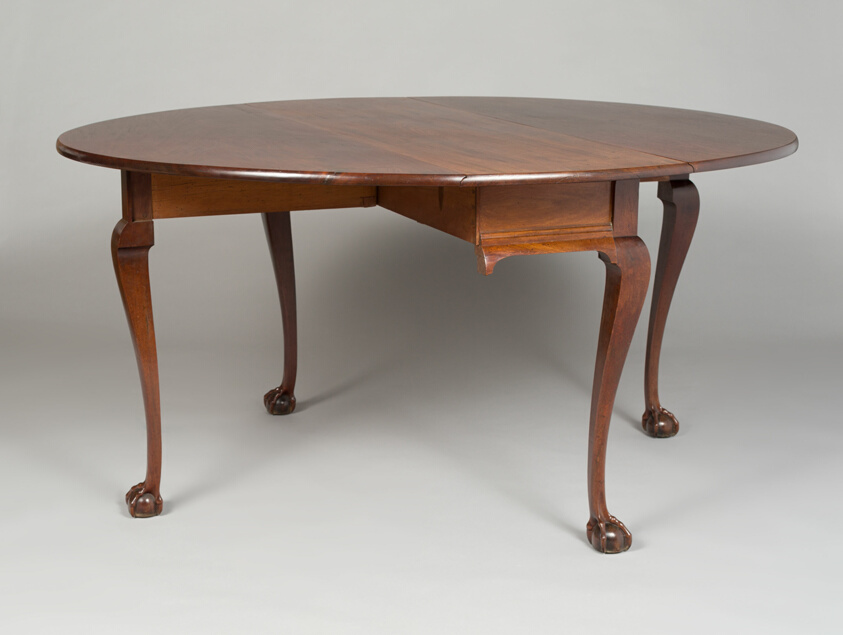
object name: Furniture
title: Table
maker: John Townsend (American, 1732–1809); Newport, Rhode Island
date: 1750–90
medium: Mahogany, beech and maple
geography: Newport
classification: table; furniture; american decorative arts; american arts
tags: furniture